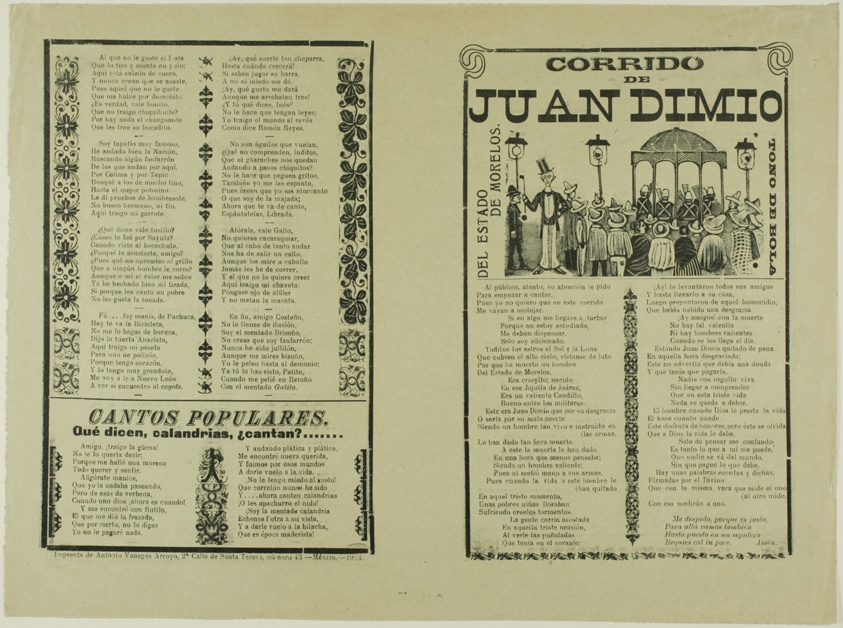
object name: Print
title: Corrido of Juan Dimio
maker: José Guadalupe Posada (Mexican, 1852-1913)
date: 1913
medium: Relief print on paper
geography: Mexico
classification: relief etching; print; prints and drawing